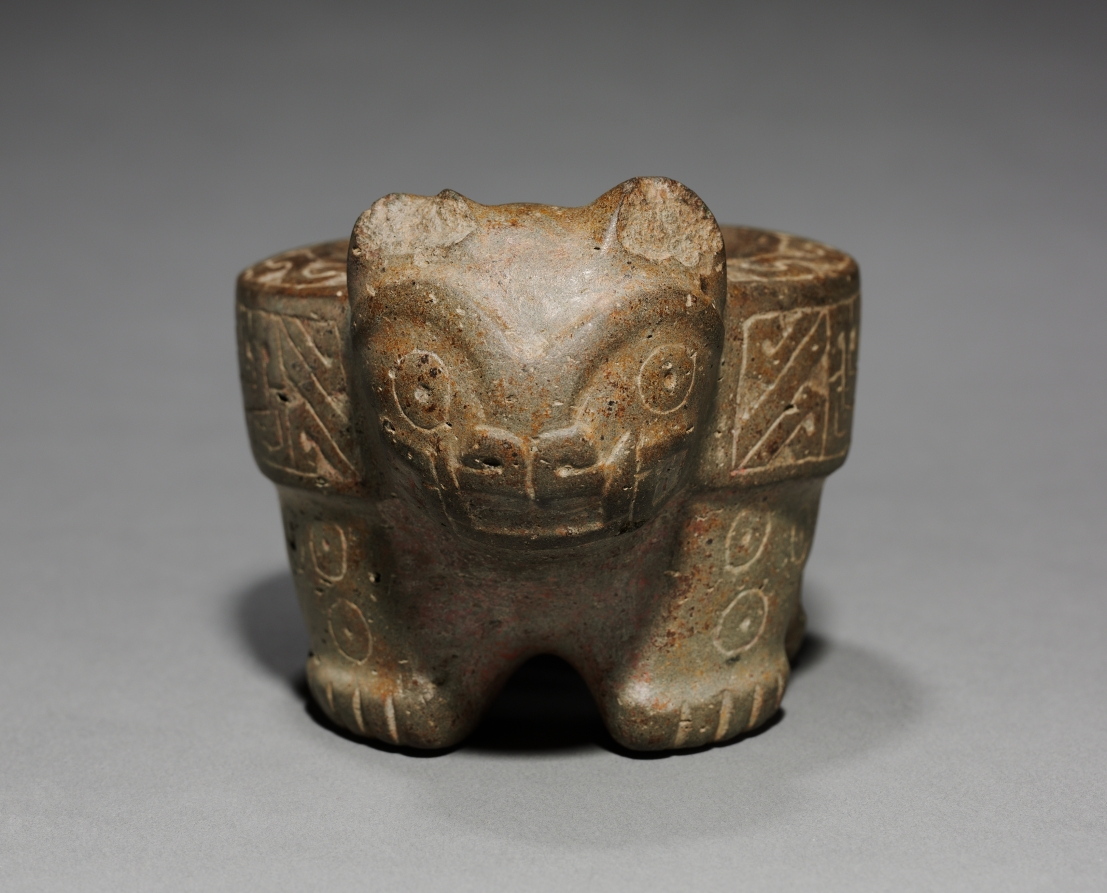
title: Feline Mortar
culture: Peru, North Highlands, Pacopampa(?), Chavín style (900-200 BCE)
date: 700–1 BCE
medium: stone, pigment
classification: Stone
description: Size suggests that this Chavín-style mortar was not used to grind bulky staples like corn, but instead pigments or plant hallucinogens used in religious rites to achieve spiritual insight and communion with cosmic forces. This may come from Pacopampa, a site in the northern highlands where elites adopted Chavín deities and worshiped them alongside local deities. These small sculptures illustrate the appeal and the spread of Chavín religion.